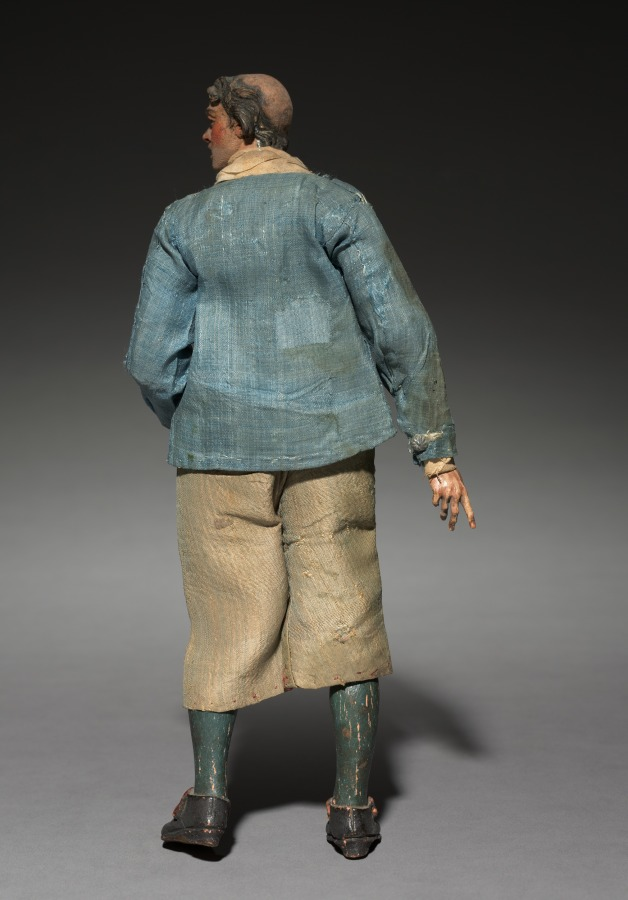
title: Figure from a Crèche: Standing Man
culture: Italy, Naples, late 18th-early 19th century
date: 1780–1830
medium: painted wood and terracotta with various textiles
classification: Sculpture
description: The practice of creating scenes of the Nativity for the home dates from the early 1700s in Italy, where people began to set up doll-like figures of about a foot or less in height. The custom was particularly popular in Naples around 1800, where crèche scenes (crèche means cradle, or crib) included many figures, whose heads and hands of painted terracotta, stuffed cloth bodies, and clothing adapted from contemporary local costumes gave them an amazingly realistic character. Representations of the birth of Jesus can be traced to the first few centuries of Christianity. Both living creatures and sculptural depictions of them were used from early times. By the late middle ages it was customary to create life-size figures of wood or stone, naturalistically painted, to represent the characters who participated in the events of Jesus's early life. These sculptures were then arranged in scenes illustrating one or both of the most important of these events, the Adoration of the Shepherds and the Adoration of the Magi—the three kings from the East who came to pay homage to the Christ child. Used in churches, these large figures were especially popular in Italy, Central Europe, Spain, and Portugal.